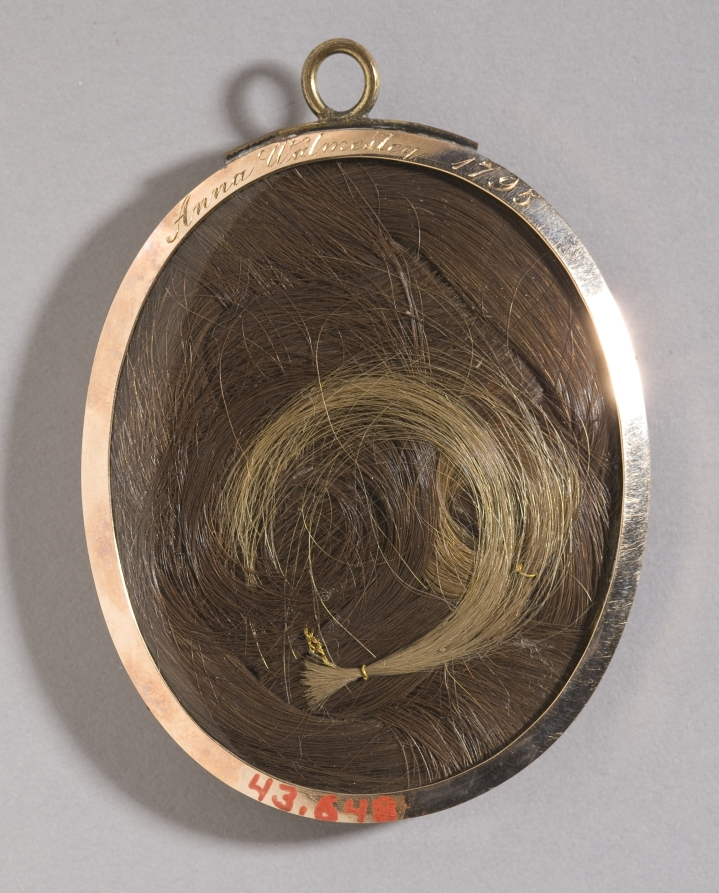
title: Portrait of Anna Walmesley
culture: England, 18th century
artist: Andrew Plimer (British, 1763–1837)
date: 1795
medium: watercolor on ivory in a gold frame with hair reverse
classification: Portrait Miniature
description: Sons of a clockmaker, Nathaniel Plimer and his younger brother Andrew initially trained in their father's profession, although they grew restless with this trade, and ran off to live with Gypsies for two years. By 1781, they were together in London, and determined to practice art. Both took up residence with established artists. Nathaniel worked as a servant to the enamelist Henry Bone, and Andrew became the valet to the portrait and miniature painter Richard Cosway. Cosway discovered Andrew copying one of his miniatures and introduced him to miniature painting. Andrew assimilated his master's airy execution and adapted Cosway's linear brushwork that leaves much of the bare ivory visible. He also employed Cosway's use of large, expressive eyes that made his miniatures appear soulfully elegant, earning him high praise among legions of admirers. A quick study, Andrew set up his own studio by 1786 and he exhibited regularly at the Royal Academy of Arts from 1786–1830. Andrew Plimer's works fall into two phases. In the first, his sitters appear more naturalistically rendered than those painted after around 1789. During the earlier period he frequently included his initials, "A.P.," on the front of the miniature, followed by a date. By contrast, he did not sign or date works in the second phase. Furthermore, in Andrew's second phase of work, he reduced his palette and, perhaps due to his high output, sitters share many visual characteristics; in particular, his women have elongated necks, long noses, and large appealing eyes.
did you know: Engraved on the top of the frame is the name Anna Walmesley, but because this was a common name, the museum has yet to discover any information about the sitter or to confirm her identity.